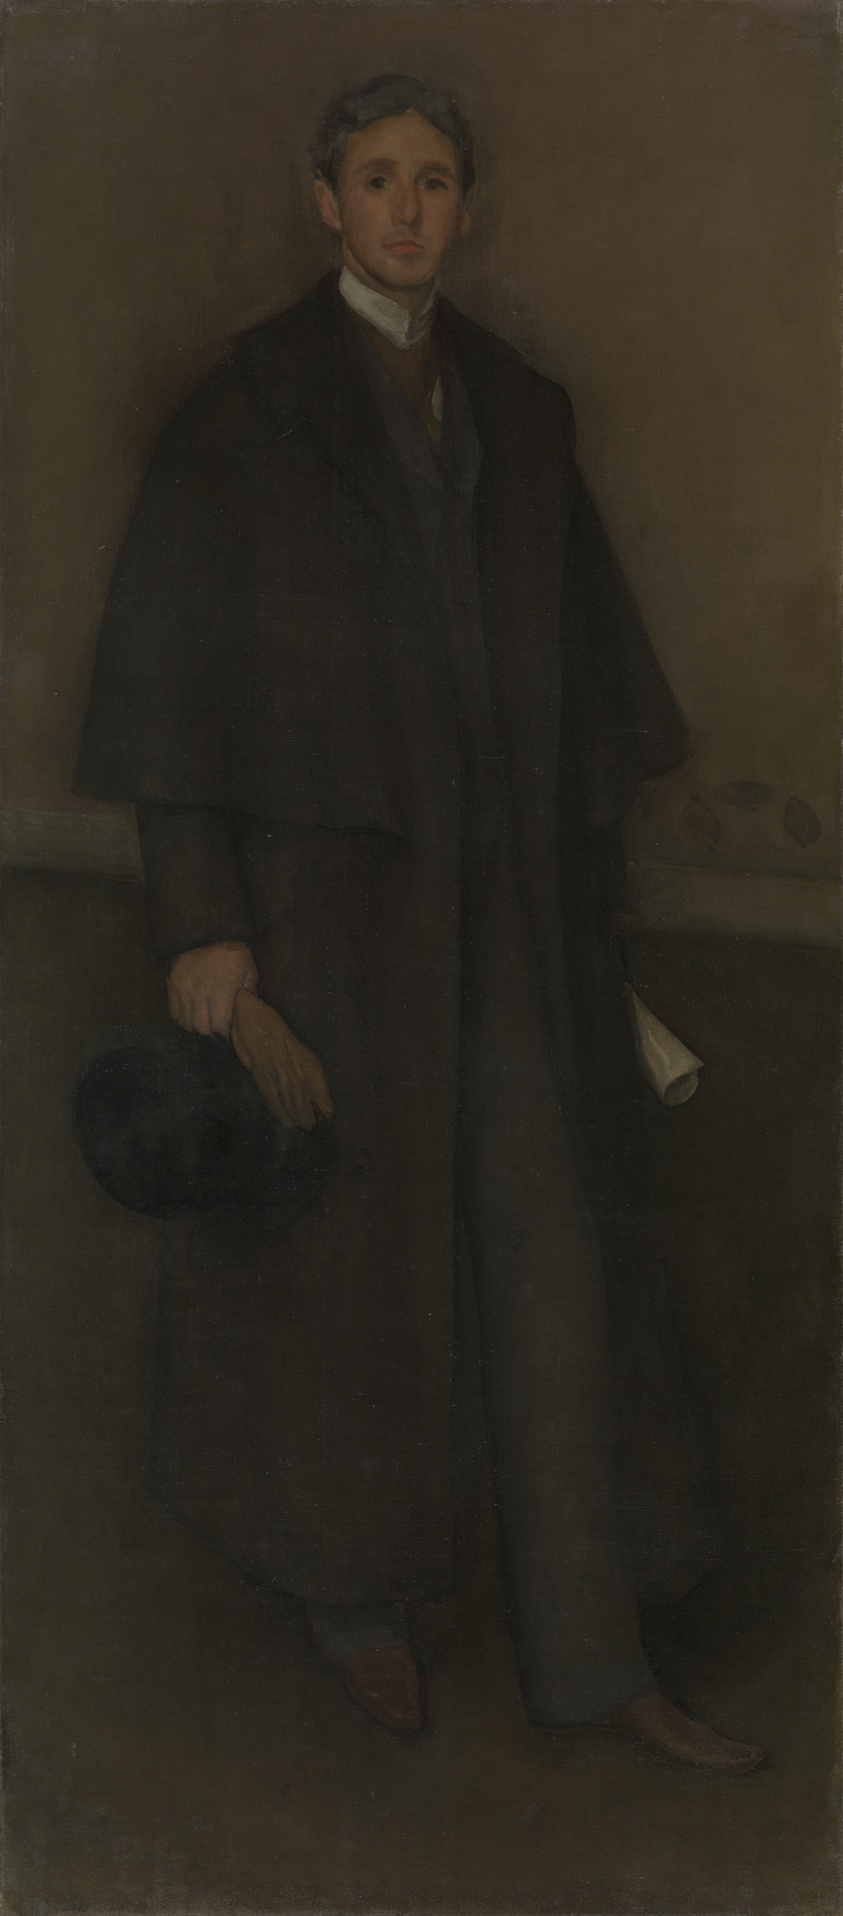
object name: Painting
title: Arrangement in Flesh Color and Brown: Portrait of Arthur Jerome Eddy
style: Modernism, Post-Impressionism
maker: James McNeill Whistler (American, 1834–1903)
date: 1894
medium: Oil on canvas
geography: Paris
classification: painting; american arts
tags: fashion, portraits, men, Chicago, people